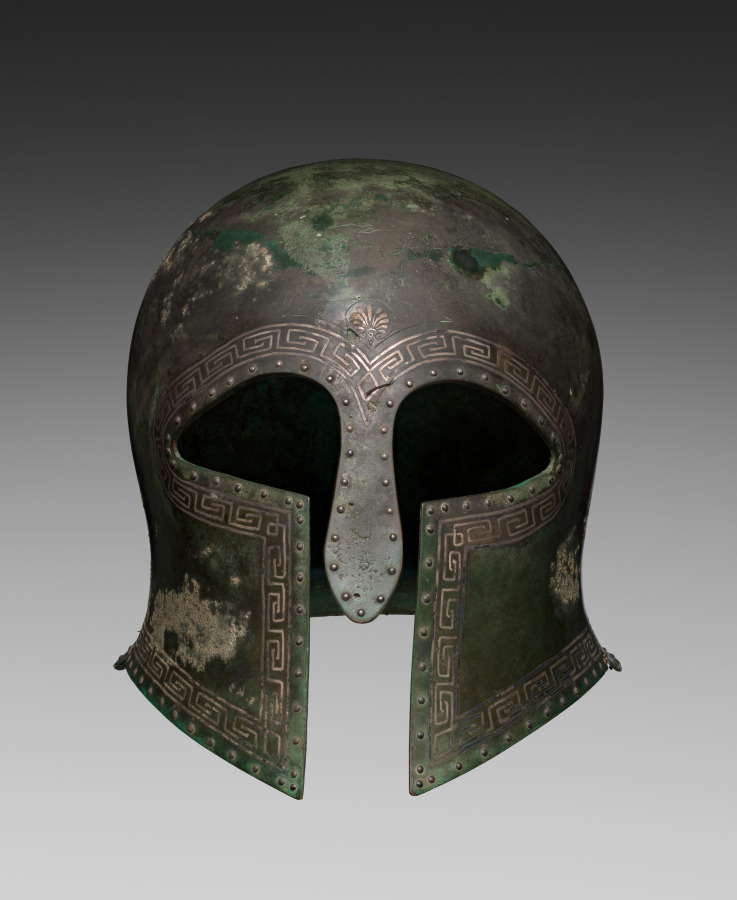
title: Corinthian Helmet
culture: Greece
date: 500–475 BCE or modern (before 1926)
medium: bronze with silver inlay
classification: Arms and Armor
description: Probably cast and then hammered into shape, this bronze helmet belongs to a type known as Corinthian, with almond-shaped eye holes, large cheekpieces, and a wide nose guard. Its significant weight raised early suspicions about authenticity, and although a 1928 technical examination found no conclusive evidence of forgery, scholars have continued to doubt its antiquity. Unusual details include the intact rivets, or metal fasteners, meant to secure liners; usually only their holes survive. The dueling warriors and inlaid palmette above the brow also find few parallels, and the silver meander pattern is unique. Most recently, a 2024 analysis found that both the copper and silver alloys of the helmet differ significantly from those expected in an ancient Greek helmet.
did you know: This helmet is very heavy—2.56 kilograms (5 lbs., 10 oz.), compared to average ancient helmets of 1.2–1.6 kilograms (about 3 lbs.).